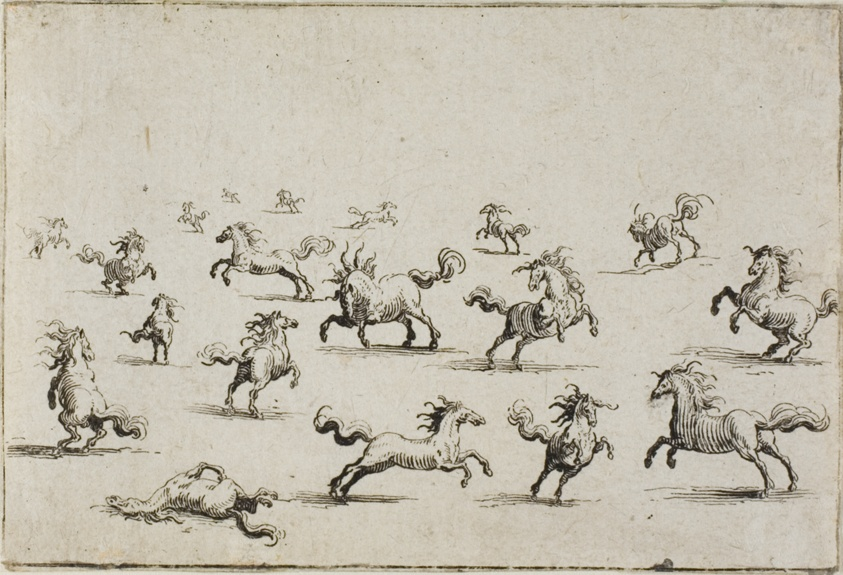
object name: Print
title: Horses Running Free, from The Caprices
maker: Jacques Callot (French, 1592-1635)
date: c. 1622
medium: Etching on ivory laid paper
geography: France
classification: etching; print; prints and drawing